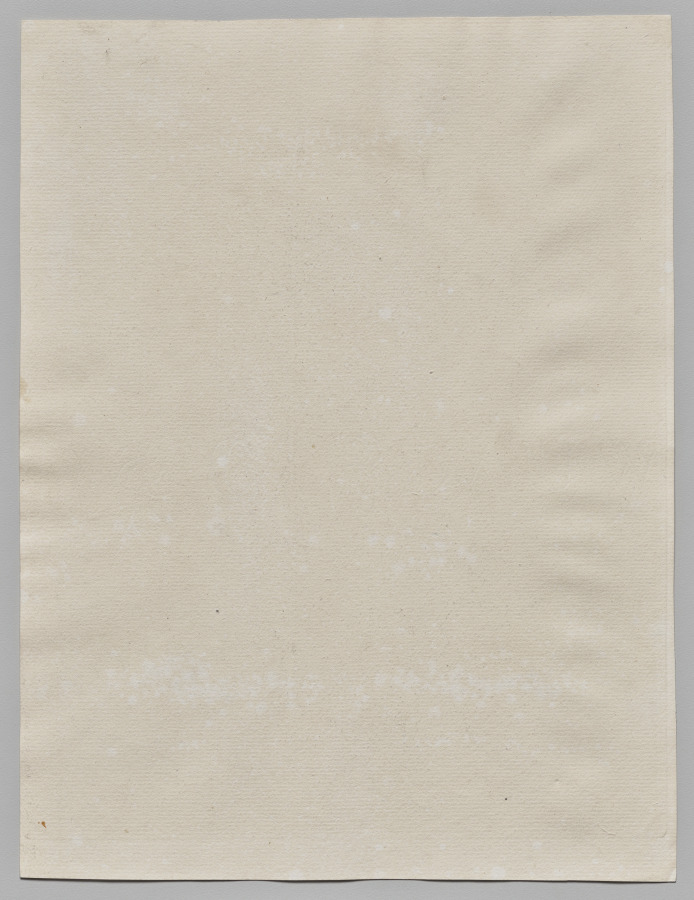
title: Wedding at the Louvre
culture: France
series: L'Assommoir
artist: Gaston de Latouche (French, 1854–1913)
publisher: Cadart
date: 1878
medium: drypoint on laid paper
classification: Print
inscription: Signed, in plate, at lower left: Gaston La Touche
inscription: inscribed, in plate, at lower right: 1878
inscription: inscribed, in blue pencil, at lower left: l’assommoir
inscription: in pencil, at lower left: La noce au Louvre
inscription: in pencil, at lower right: …Et des siècles d’art passaient devant / leur ignorance ahurie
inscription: Watermark: D.C. BLAUW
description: Although his work changed throughout his career, early on Gaston La Touche belonged loosely to the Impressionist circle through his association with Édouard Manet. La Touche explored subjects—such as that seen here—taken from the lives of working-class Parisians. This print represents a scene from naturalist author Émile Zola’s novel L’Assommoir, which detailed the rise and fall of a laundress named Gervaise. La Touche is said to have collaborated with the author on the imagery and exhibited the entire series at the public Paris Salon in 1879.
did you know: Gaston La Touche completely changed the subjects and style of his work around 1890 and destroyed much of his early work.